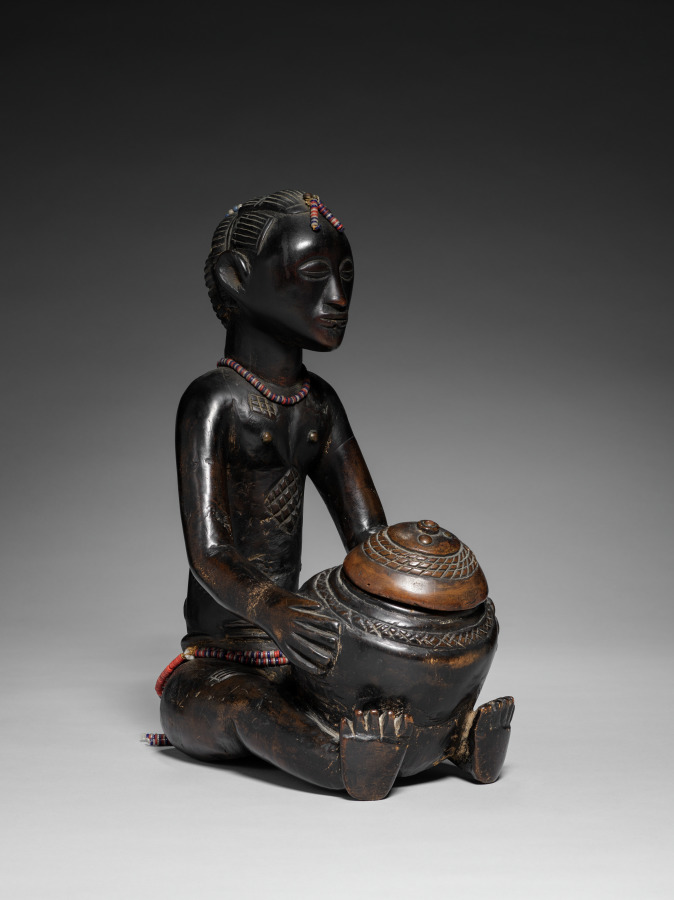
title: Female Bowl-Bearing Figure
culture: Africa, Central Africa, Democratic Republic of Congo, Luba-style carver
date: late 1800s-early 1900s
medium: Wood, glass beads, upholstery studs, plant fiber, and iron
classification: Sculpture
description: In Luba-style art, an object's beauty affects how well it works. While bowl-bearing figures had many possible uses, a royal diviner likely used this well-carved image of a woman carrying a bowl in rituals. Dusty traces of mpemba (white chalk) fleck the shining exterior and the bowl's interior, showing it once held this sacred powder. Diamond-shaped scarification marks at her waist, chest, and back add to her beauty. Her hair is carved into the cascading layered hairstyle worn in the Luba region at the turn of the twentieth century. Strands of imported glass beads encircle her waist and neck, and dangle from her hair. The alternating white and blue beads may symbolize the moon and Mbidi Kiluwe, a culture hero linked to royal practice and smithing. While much Luba-style art depicts women—who are societally important—men created and owned the majority of such works.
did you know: Symbolic of anvils, the round metal tacks decorating the figure's hair "pin" spirits and their secrets within it. They are at the hairline and each of the four hair cascades (the bottommost is now gone).